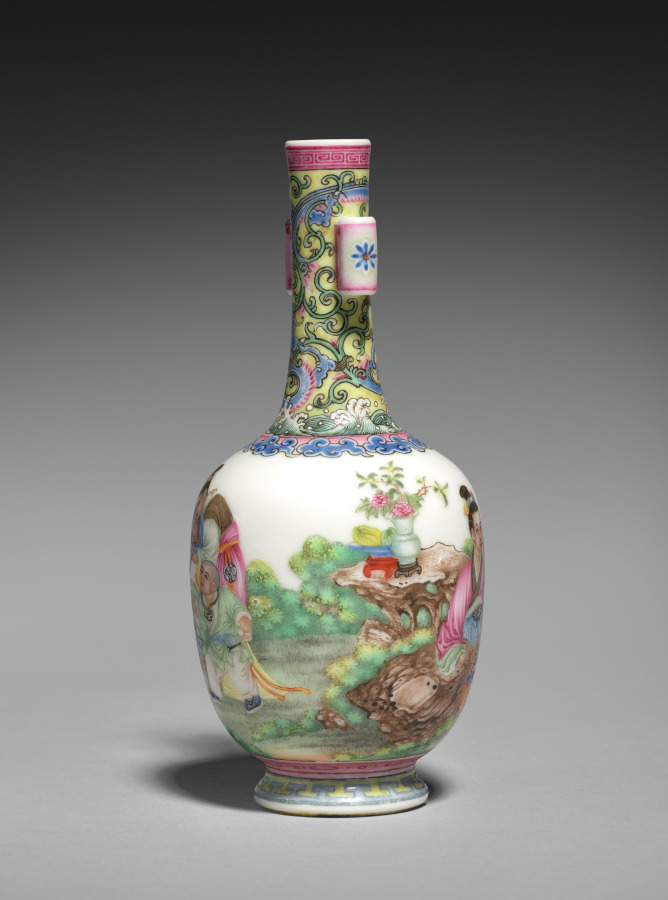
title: Vase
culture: China, Qing dynasty (1644-1911), Qianlong mark and reign (1736-95)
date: 1736–95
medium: Porcelain with decoration in colored fa-lang enamels, Guyuexuan ware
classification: Ceramic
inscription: 乾隆年製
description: The four-character mark on the base of this vase indicates that it was made in Jingdezhen and then sent to Beijing to be decorated in the imperial workshops by painters who were trained in using Western perspective and shading.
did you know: The child in orange has a bun above his ear, while the rest of his head is clean-shaven, like the other children’s.